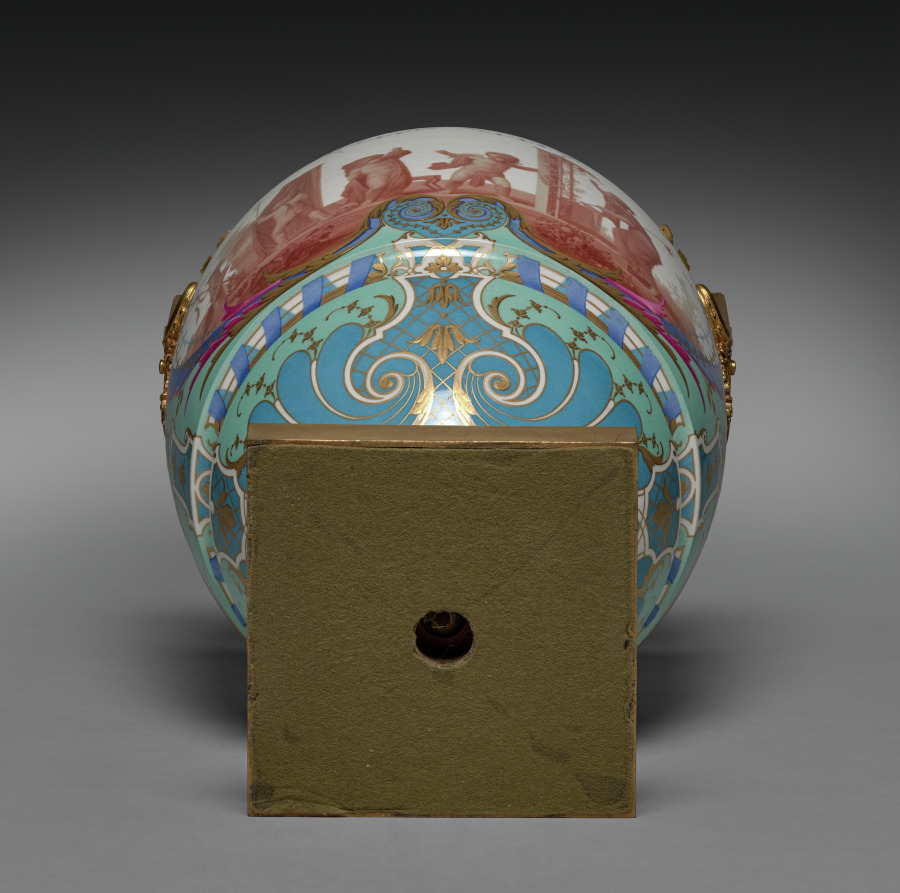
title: Vase, Feuille d'Eau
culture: France, Sèvres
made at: Sèvres Porcelain Factory (French, est. 1756)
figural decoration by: Paul Marie Roussel (French, 1804–1877)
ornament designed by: Emile Renard (French)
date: 1858–62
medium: porcelain with gilt bronze mounts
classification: Ceramic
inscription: figural paintings signed obverse and reverse: "PMROUSSEL INV & PIN"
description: Feuille d'Eau means "waterleaf" and refers to the name given to the shape of this vase at the Sèvres factory. In English, waterleaf is the common name for a plant with bell-shaped flowers. The term is also applied to a stylized plant motif used in Graeco-Roman ornament. This vase was exhibited by the Sèvres firm at the International Exhibition held in London in 1862.